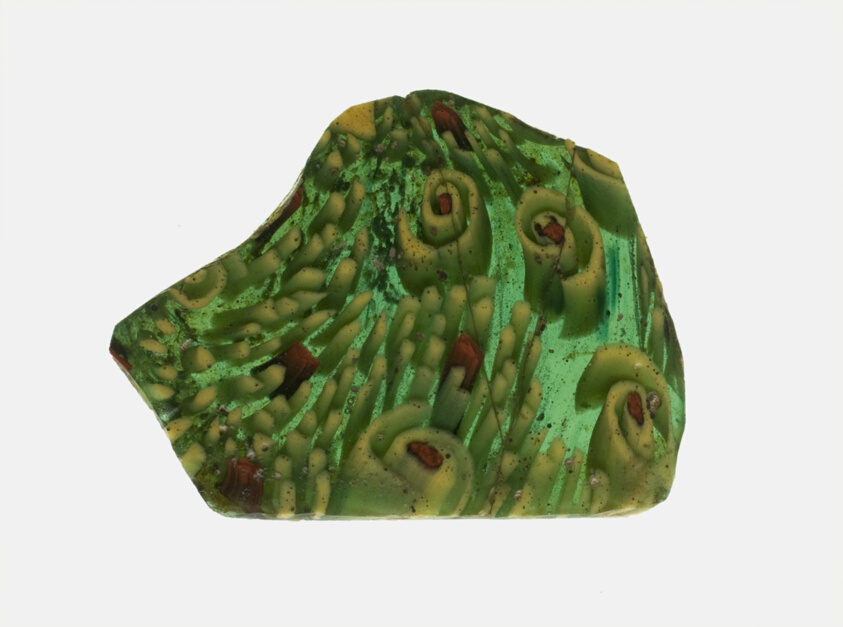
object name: Decorative Arts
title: Bowl Fragment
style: roman (ancient, style or period), ancient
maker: Roman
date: 1st century BCE-1st century CE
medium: Glass, mosaic glass technique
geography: Roman Empire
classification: fragment; bowl; decorative arts